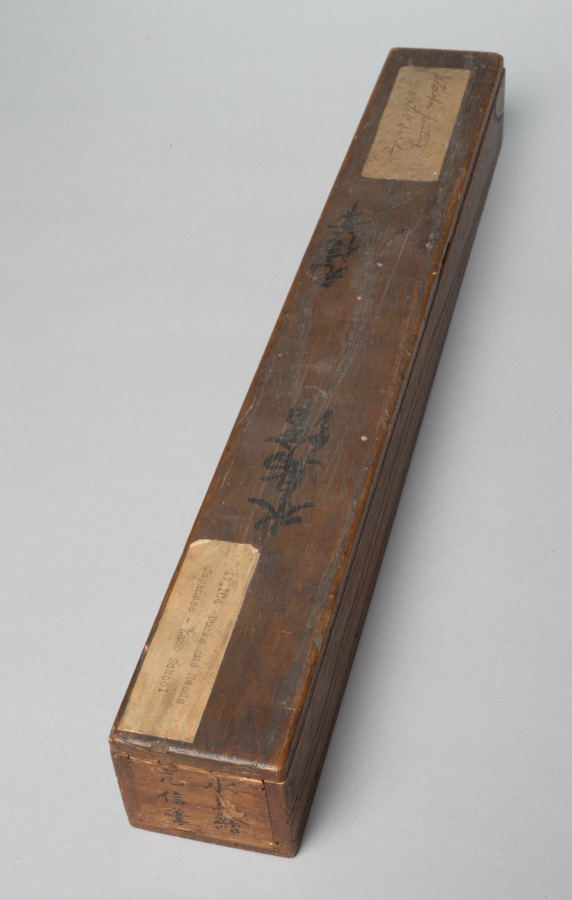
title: Ducks and Reeds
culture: Japan, Momoyama period (1573-1615) to Edo period (1615-1858)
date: early 1600s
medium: hanging scroll; ink on paper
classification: Painting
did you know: This painting was produced by a member of the Kano school.